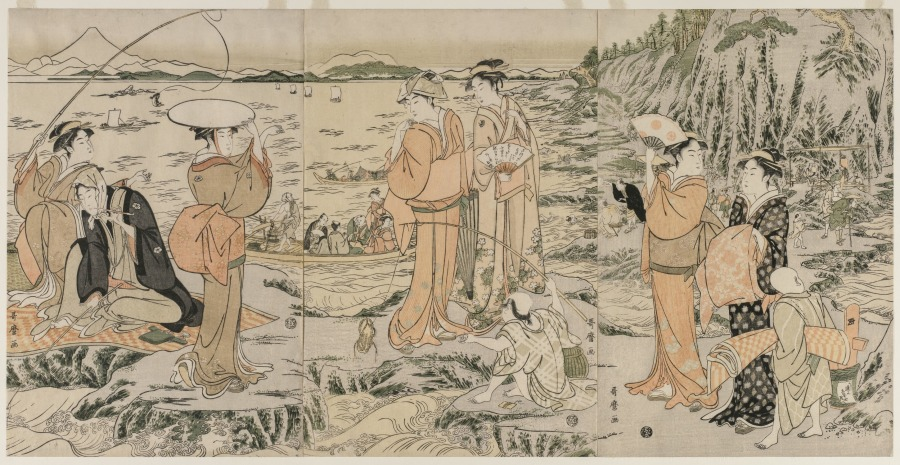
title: Fishing at Iwaya on Enoshima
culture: Japan, Edo period (1615–1868)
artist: Kitagawa Utamaro (Japanese, c. 1754–1806)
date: c. 1790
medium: triptych of color woodblock prints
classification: Print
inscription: Signature: Utamaro ga Censorship Seal: kiwame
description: The island Enoshima in Kanagawa prefecture in eastern Japan, near the city of Kamakura, is one home of the goddess Benzaiten, who is associated with water as well as music and entertainment. The island’s Iwaya caves were for centuries a place for meditative retreat, but by the time this scene near their entrance was printed, pilgrimages combining religious sentiment with touristic intent were popular, and remain so today.